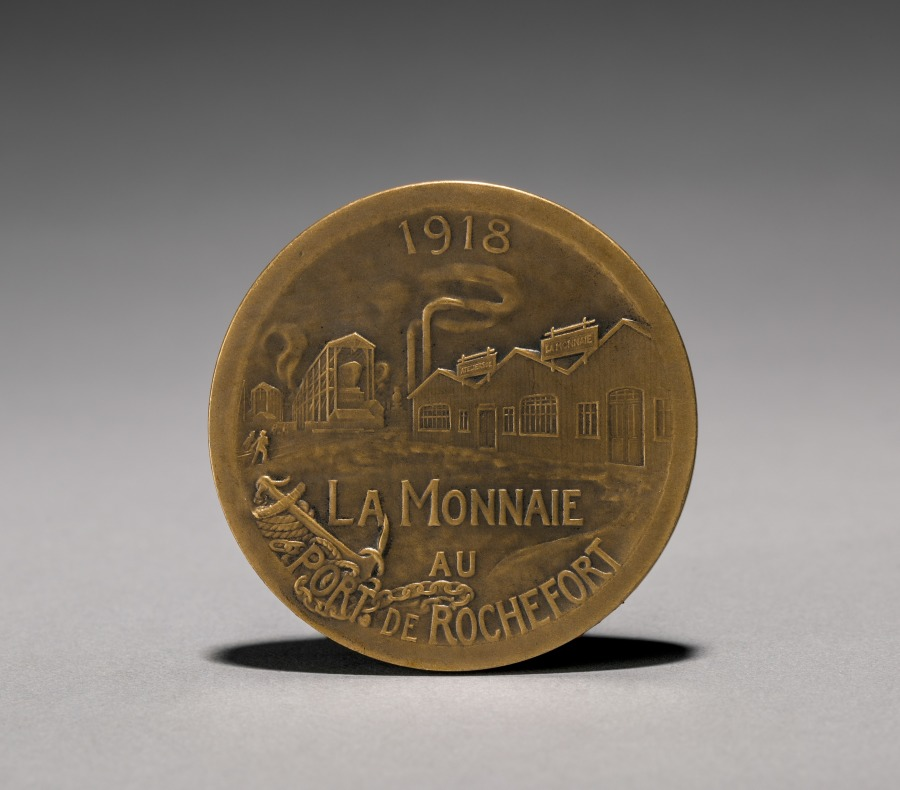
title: Medal (reverse)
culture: France, 20th century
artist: Edmond-Eugene-Emile Lindauer (French, 1869–1942)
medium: bronze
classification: Metalwork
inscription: "La Monnaie au Port de Rochefort."